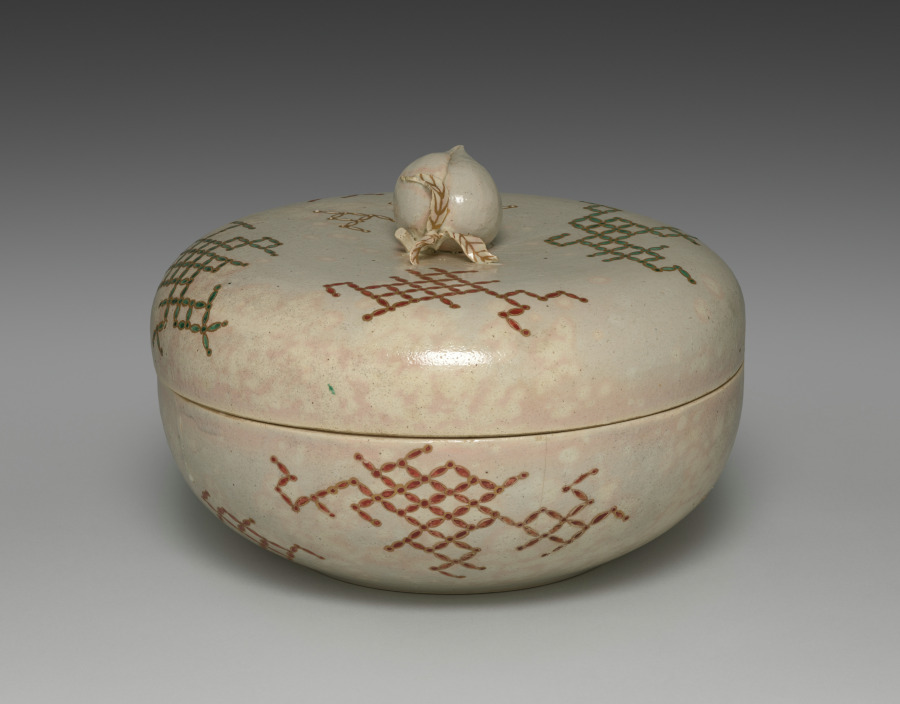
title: Covered Bowl with Seven Treasures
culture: Japan, Edo period (1615–1868)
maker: Seifū Yohei II (Japanese, 1844–1878)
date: 1861–78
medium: Stoneware with overglaze color enamel and gold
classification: Ceramic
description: The box lid for this large covered bowl by Yohei II identifies it as in the style of Ninsei, a reference to Nonomura Ninsei. Overglaze enamels in red, green, and white sit within lattices of jewel-shaped gold forms scattered across the lid and base in a design known as the seven treasures. At the center of the lid is a knob in the shape of a peach with a stem and leaves. A prominent feature of the piece is the appearance of warm pink dots known as gohon. Here creamy at their center and with a gradation to almost red at the edges, they appear during firing due to high iron content in the clay. Pieces with this effect were made in emulation of certain ash-glazed ceramics imported from Korea. The originals were made to order for the Japanese market at a kiln in Busan. The kiln was established within the Japanese diplomatic compound in that port city by the lord of Tsushima in 1639 and continued production until 1717. In the 17th century, teabowls from Korea in a variety of styles were extremely popular among practitioners of Japanese-style tea, and they were soon copied by ceramists active on the archipelago, including in Kyoto.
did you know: The peach's leaf veins are detailed in gold.